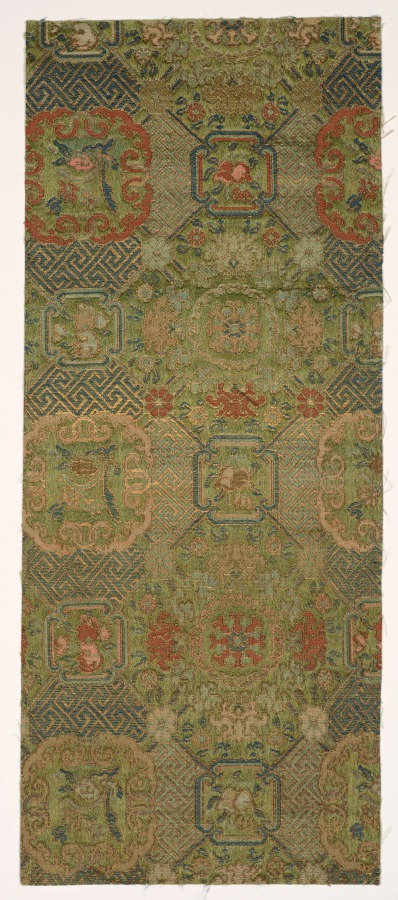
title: Textile Fragment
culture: Japan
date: 1800s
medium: silk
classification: Textile